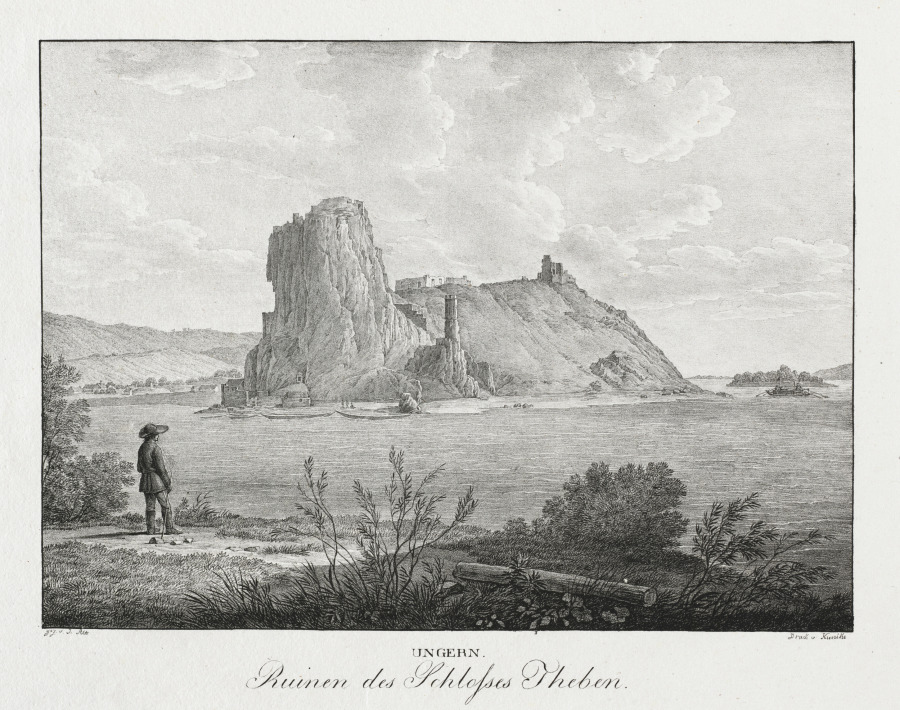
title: Ungern, Ruinen des Schlosses Theben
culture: Austria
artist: Jakob Alt (Austrian, 1789–1872)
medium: lithograph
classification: Print